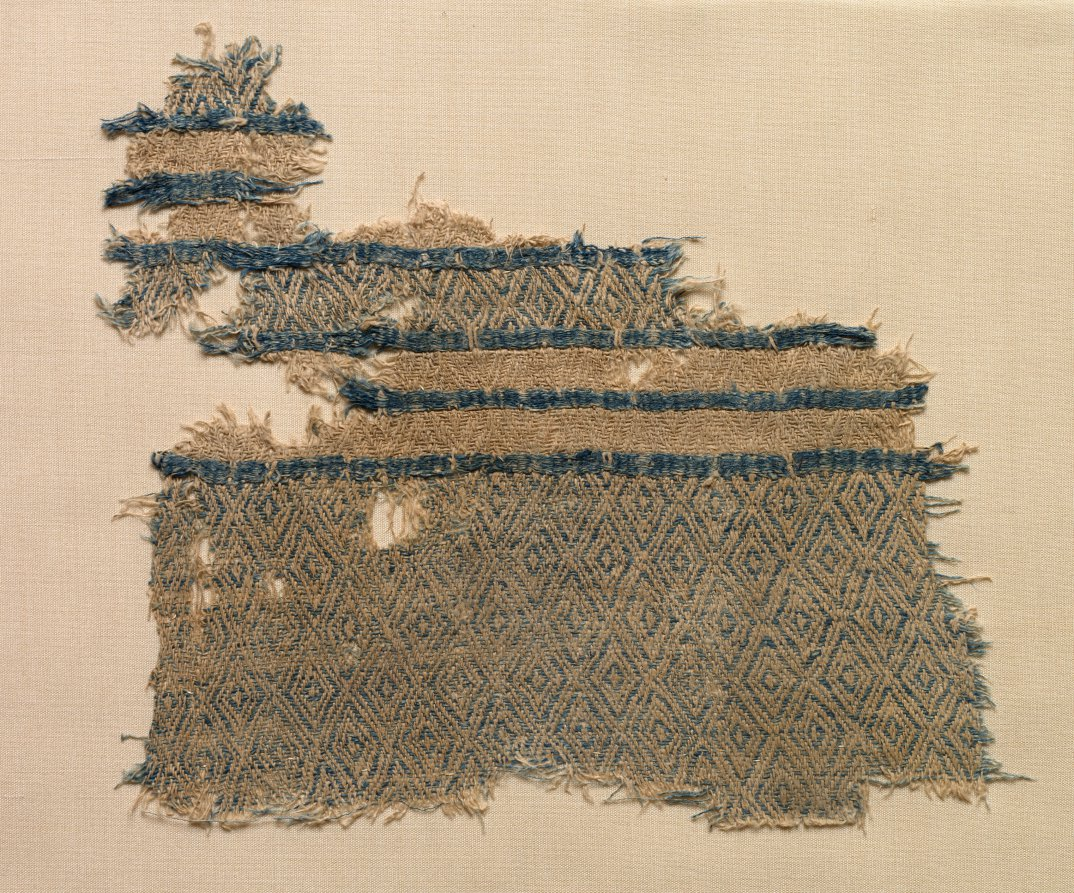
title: Fragment of linen damask with diamond designs in bands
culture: Egypt, Fatimid period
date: probably 1000s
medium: lozenge twill with areas of weft floats: linen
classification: Textile